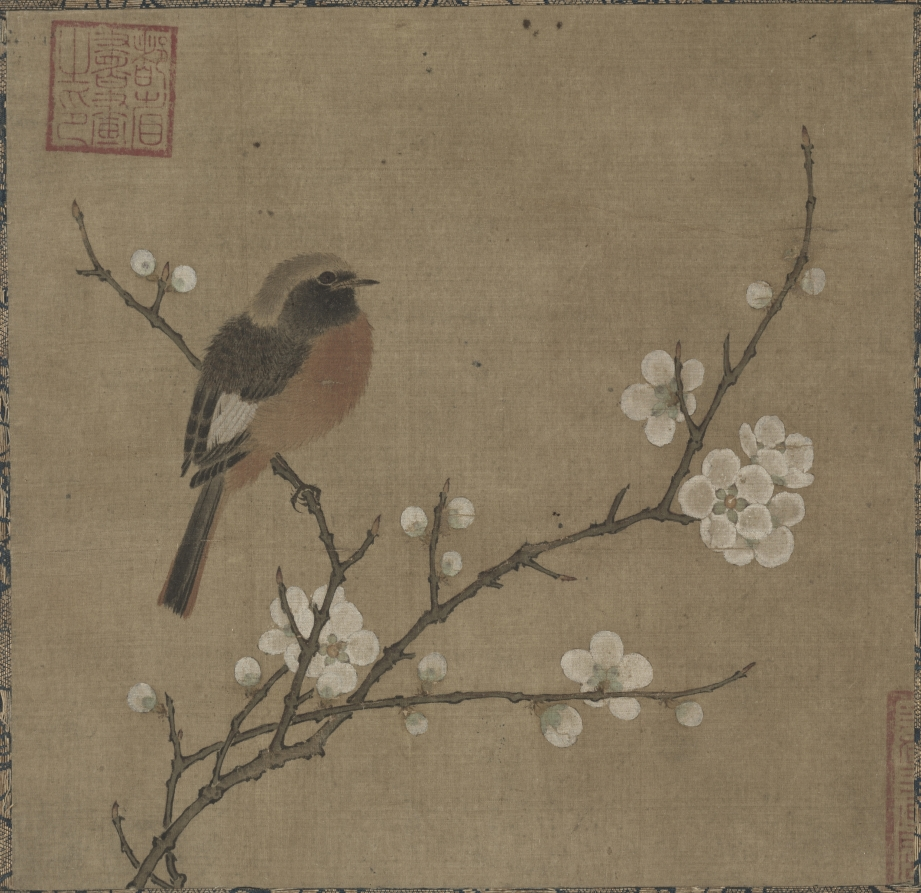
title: Bird on a Flowering Branch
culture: China, Southern Song dynasty (1127–1279)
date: 1100s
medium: album leaf mounted as a hanging scroll; ink and color on silk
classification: Painting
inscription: 2 seals: 1 official seal of the Yuan Dynasty; 1 unidentified partial seal.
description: A male redstart sits hunched on the branch of a flowering plum tree in early spring. The bird’s plumage is rendered in fine detail with a great naturalistic sense, characteristic of Southern Song court painting. While redstarts tend to spend the winter in warmer climates, they may have been seen during the mild winters in China’s southeast in Hangzhou, the seat of the former imperial painting academy where this album leaf was presumably produced. The small square painting must have once been part of an album. When collected in Japan, it was mounted as a hanging scroll, presumably to fit it in an alcove to be enjoyed during the tea ceremony.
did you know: The seal at the upper left is an official Yuan dynasty seal used on paintings and calligraphy in the imperial collection.